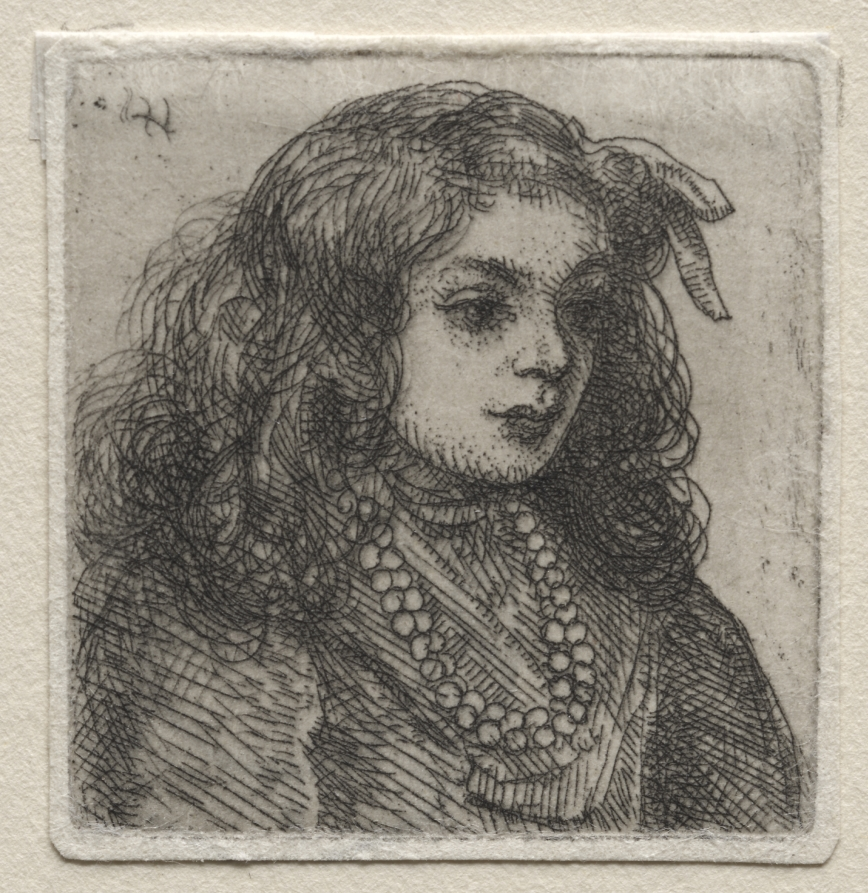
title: Paris: Carmen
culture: America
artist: Ernest Haskell (American, 1876–1925)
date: 1910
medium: etching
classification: Print